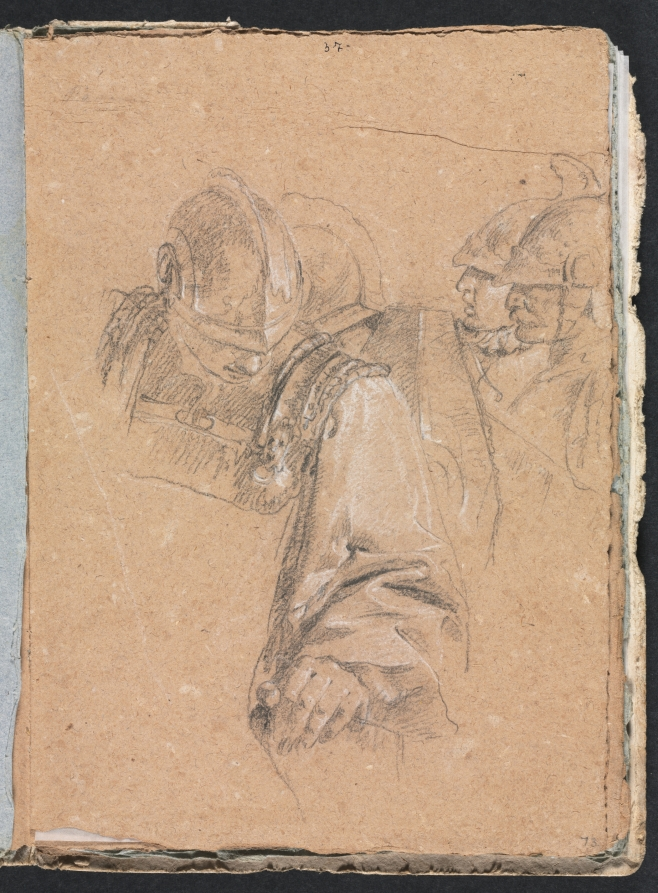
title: Verona Sketchbook: Soldiers (page 73)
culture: Italy, 18th century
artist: Francesco Lorenzi (Italian, 1723–1787)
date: 1760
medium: black chalk with white heightening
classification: Bound Volume